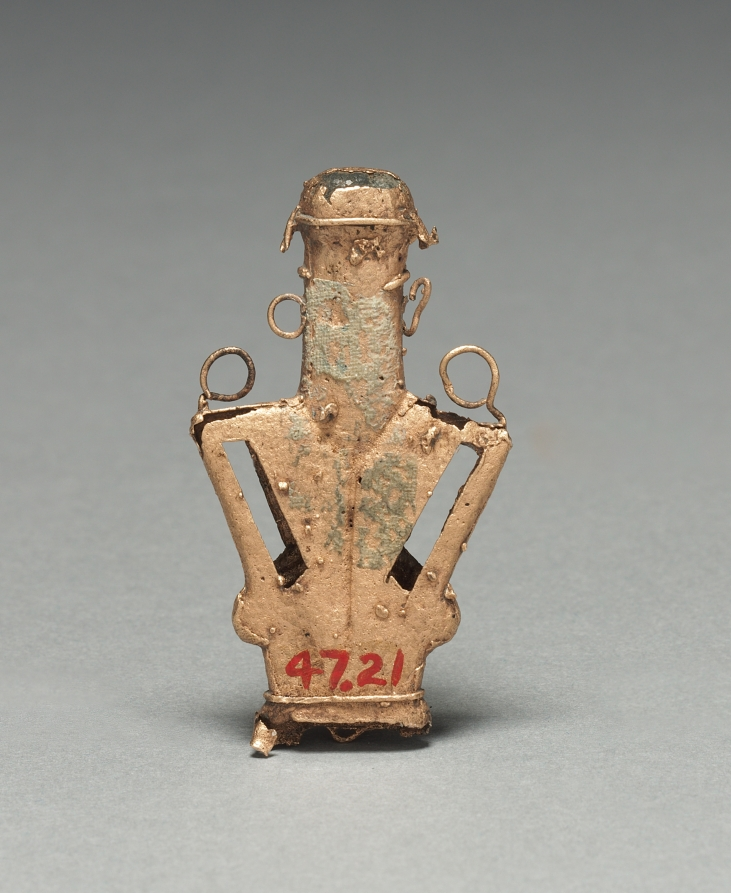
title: Tunjos (Votive Offering Figurine)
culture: Colombia, Muisca style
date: c. 900–1550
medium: cast gold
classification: Metalwork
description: Unlike the other gold ornaments in this gallery, tunjos were not worn; instead, they served as offerings that were deposited in sacred places, such as lagoons and caves. They often depict humans who hold something-here a container with a head (1947.22), a spear thrower (1947.19), and a bird-tipped (1957.25). The subject must have corresponded to a benefit being asked from the gods. Perhaps because they were not meant for display, tunjos were not finished after lost-wax casting. Flaws remain uncorrected, surfaces are unpolished, and gold that backed into the sprue (pouring channel) was left in place, creating the button-like form at the bottoms of 1947.24 and 1947.17, which were cast upside down.